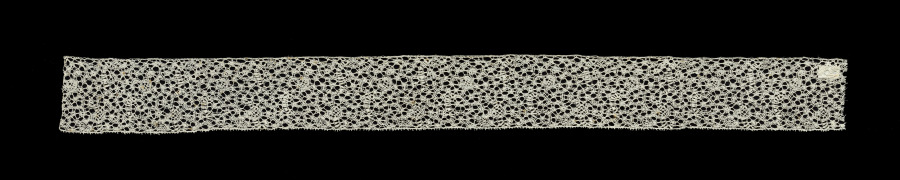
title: Lace Edging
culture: Belgium, Binche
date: early 1700s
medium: Linen: bobbin lace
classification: Lace